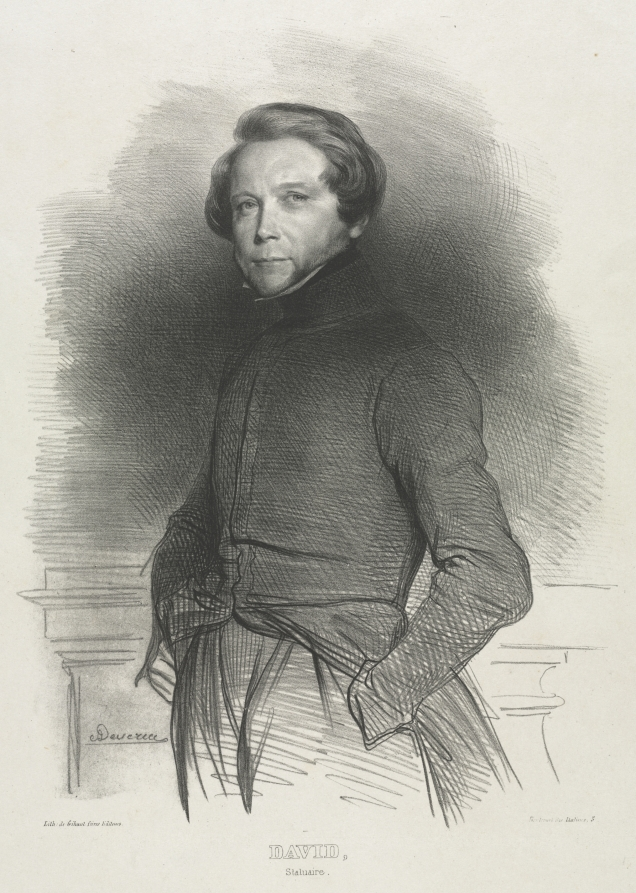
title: Pierre Jean David, called David d'Angers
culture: France, 19th century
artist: Achille Devéria (French, 1800–1857)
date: c. 1830–49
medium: lithograph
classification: Print